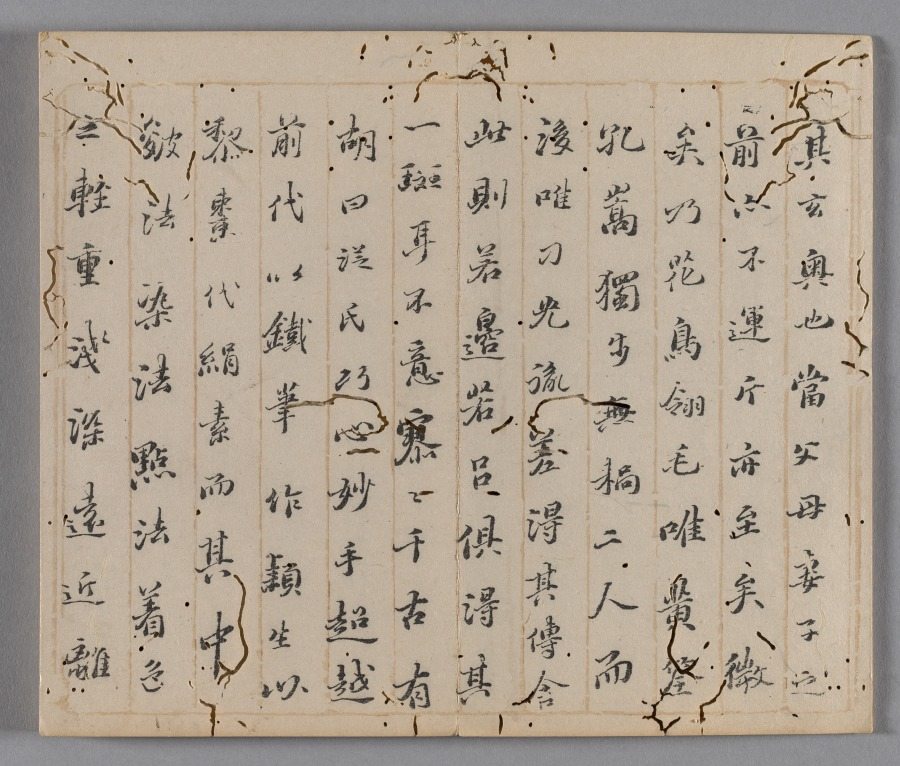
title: Ten Bamboo Studio Painting and Calligraphy Handbook (Shizhuzhai shuhua pu): Birds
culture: China, Qing dynasty (1644-1911)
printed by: Hu Zhengyan (Chinese, c. 1584–1674)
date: 1633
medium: Woodblock-printed book; ink and colors on paper; first edition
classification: Print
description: Color printing reached a level of perfection in the early 1600s, as seen in this Ten Bamboo Studio Collection of Calligraphy and Painting and the Mustard Seed Garden Manual of Painting (printed 1679 and 1701). The painterly quality, precision in registering (aligning) the woodblocks, and harmonious colors made them the most successful color print editions in Chinese history. Both editions were printed and compiled in Nanjing, spread nationwide, and had a great impact on the arts in Japan and Korea.